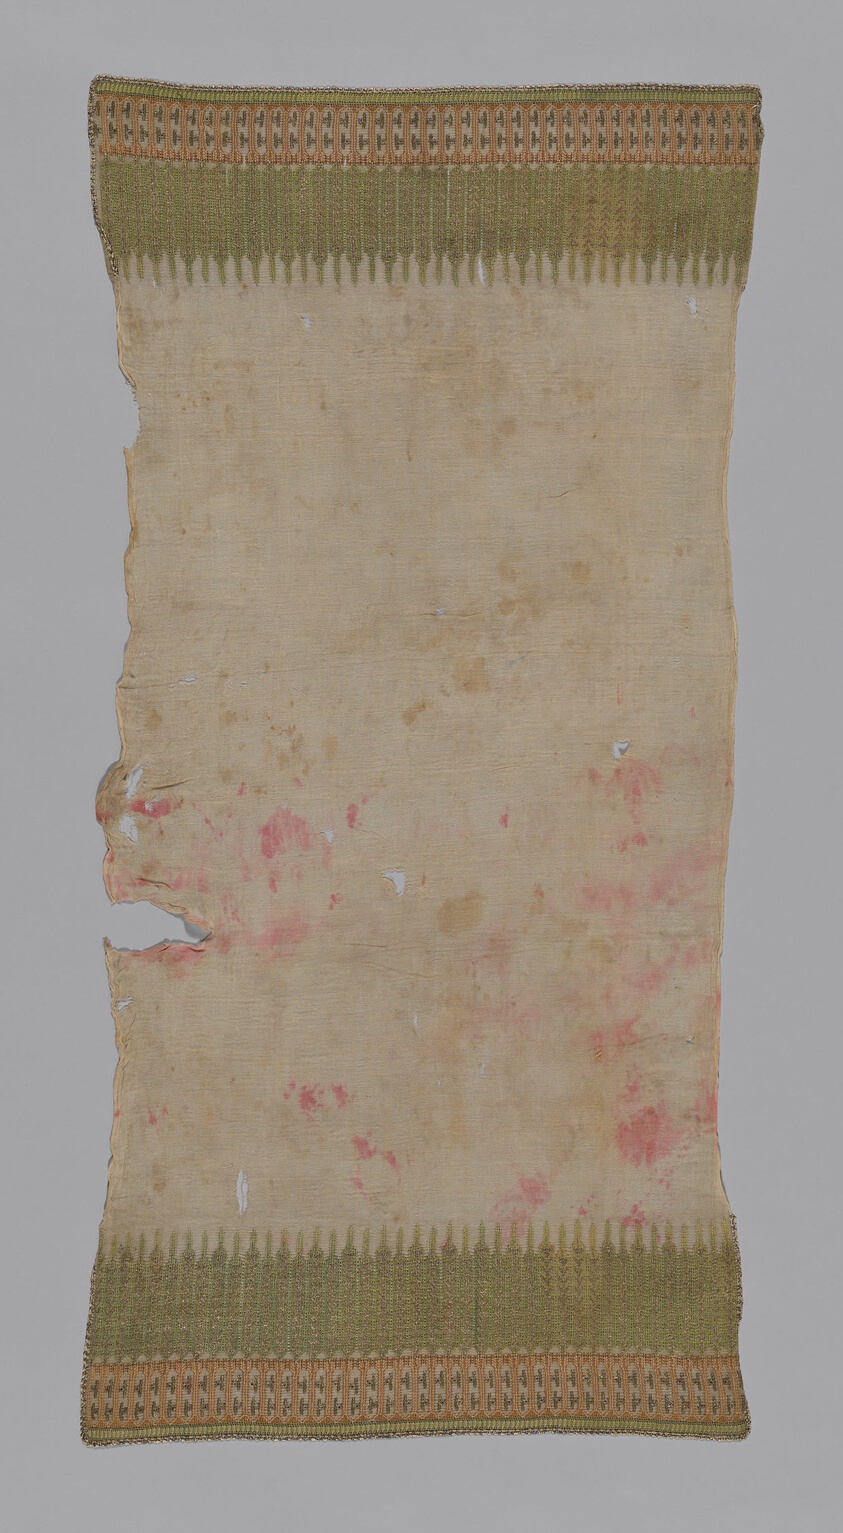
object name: Textile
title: Towel or Napkin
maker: Turkey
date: 19th century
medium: Embroidered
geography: Turkey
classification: textile; needlework (visual works); weaving